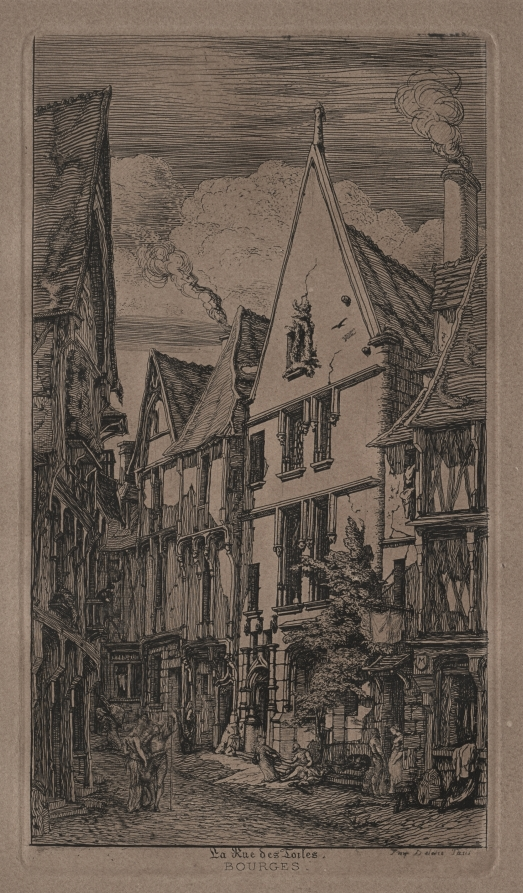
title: Rue des Toilés, Bourges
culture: France, 19th century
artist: Charles Meryon (French, 1821–1868)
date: 1853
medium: etching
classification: Print